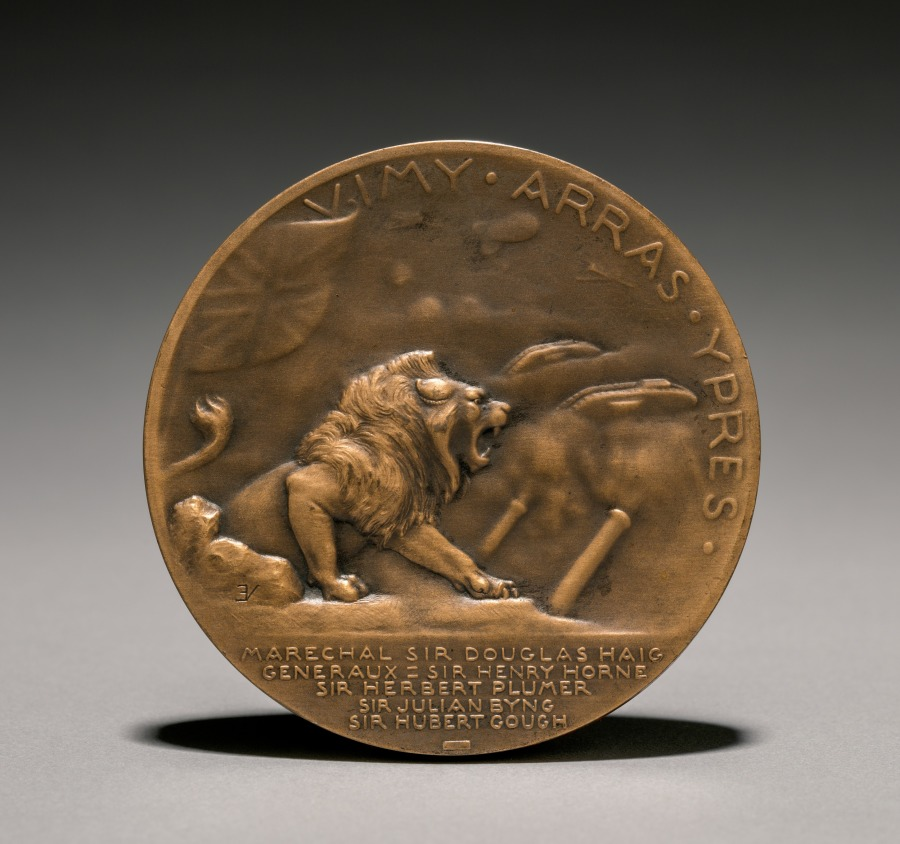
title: Medal (reverse)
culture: France, early 20th century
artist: Èmile Séraphin Vernier (French, 1852–1927)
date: 1921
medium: bronze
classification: Metalwork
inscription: "Vimy, Arras, Ypres, Marechal Sir Douglas Haig, Generaux Sir Henry Horne, Sir Herbert Plumer, Sir Julian Byng, Sir Hubert Gough."